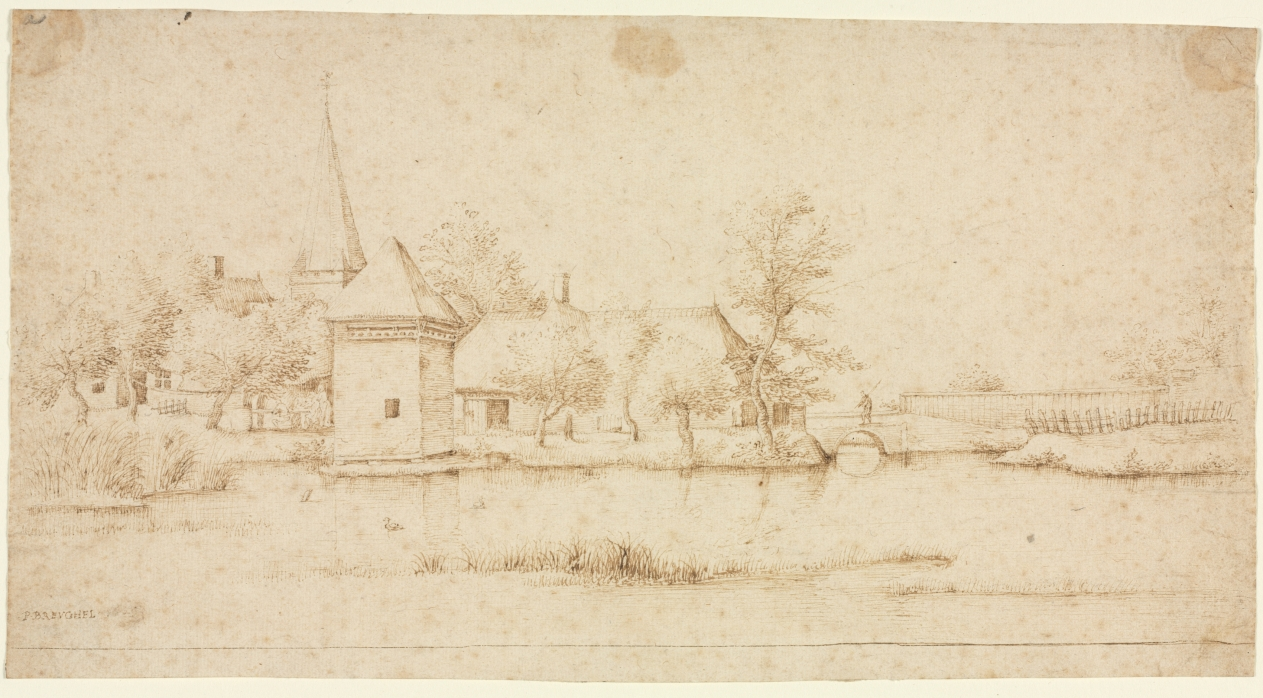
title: Landscape with a Moated Village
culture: Flanders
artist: Master of the Small Landscapes (Flemish)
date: 1559–61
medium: pen and brown ink; framing lines in brown ink (bottom)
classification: Drawing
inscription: [signed?], lower left, in brown ink: P BREVGHEL [1625 ?][date erased, legible under UV] ; upper left, in graphite: a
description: The so-called small landscapes published in Antwerp in the late 1550s constitute a turning point in the history of landscape as a genre. This drawing and its related print (1964.404) from the series present the local countryside in a simple, unembellished composition from a level point of view. The artist portrayed the rustic village, pasture, and country road in a straightforward and immediate fashion. The title page for the series, issued by publisher Hieronymus Cock in Antwerp, advertised that the views were made “from the life” (naer d’leven), thus are real places directly observed. Such humble sites would define the golden age of Dutch landscape in the following century.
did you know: The false signature "P. BREUGHEL" refers to Pieter Bruegel the Elder (c. 1529–1565) but reverses the usual order of "u-e" in the artist's name.